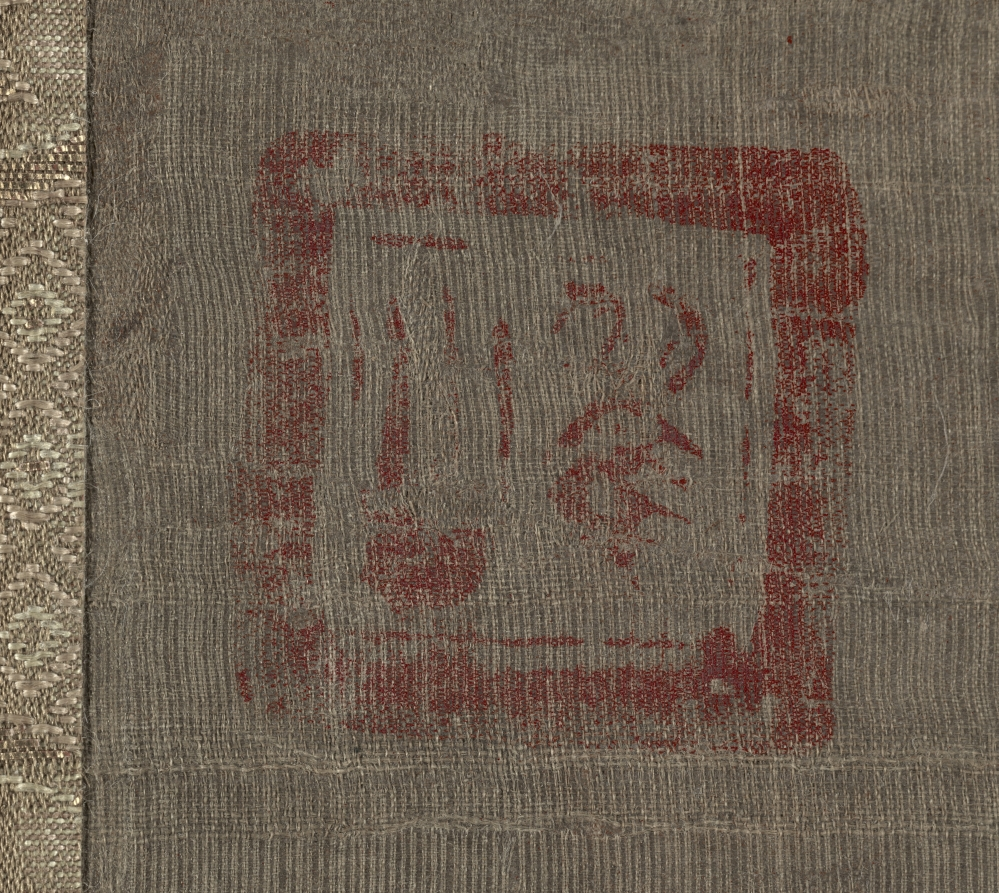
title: Bamboo in Four Seasons: Winter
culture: China, Yuan dynasty (1271-1368)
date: 1279–1368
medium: hanging scroll; ink on silk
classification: Painting